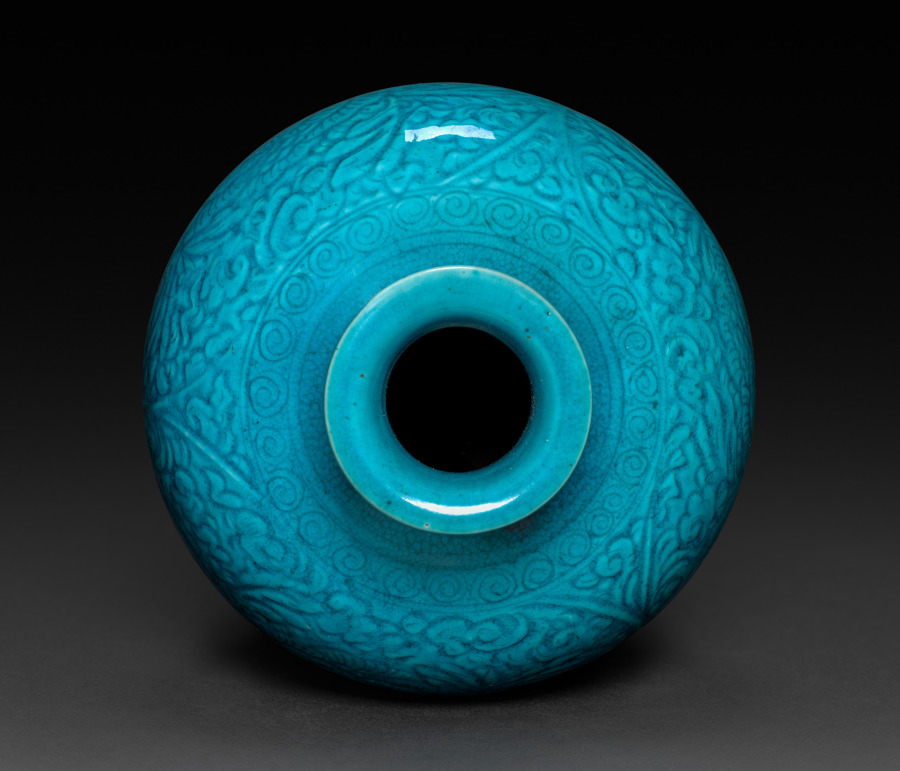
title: Vase with peacock blue glaze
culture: China, Qing dynasty (1644-1911), Kangxi reign (1661-1722)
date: 1662–1722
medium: porcelain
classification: Ceramic